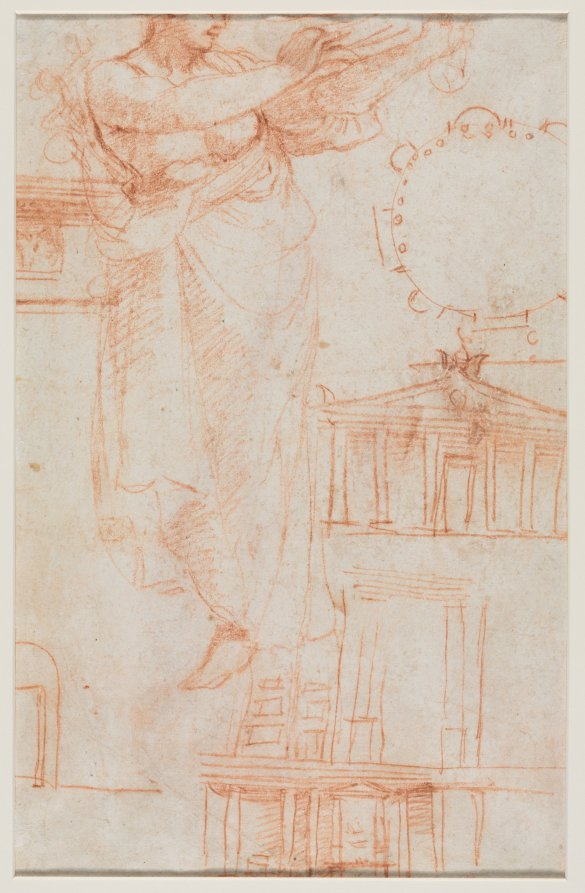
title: A Draped Female Figure (possibly an Amazon) and Architectural Studies (verso)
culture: Northern Italy, Emilia, first half 16th Century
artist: attributed to Correggio (Italian, 1489?-1534)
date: c. 1525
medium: red chalk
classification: Drawing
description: In this chalk study of a lone, fallen soldier, the brown ink inscription at the bottom of the sheet indicates that at one time it was believed to be by Raphael. However, it is now attributed to Correggio based on the sensuous drawing style that focuses attention on some details, like the soldier’s leg and foot, while other contours are barely sketched and shaded. The back, or verso, of the sheet presents quick sketches of classical-style architecture and a woman with a quiver of arrows on her back; she may be an Amazon, one of a race of warrior women skilled in archery, or Diana, goddess of the hunt.